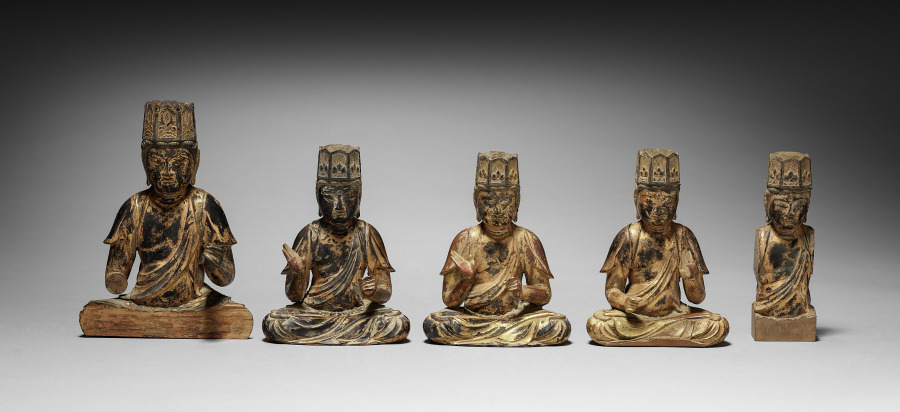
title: Set of Five Bodhisattvas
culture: Japan, Heian period (794–1185)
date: 900s–1100s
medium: gilded wood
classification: Sculpture